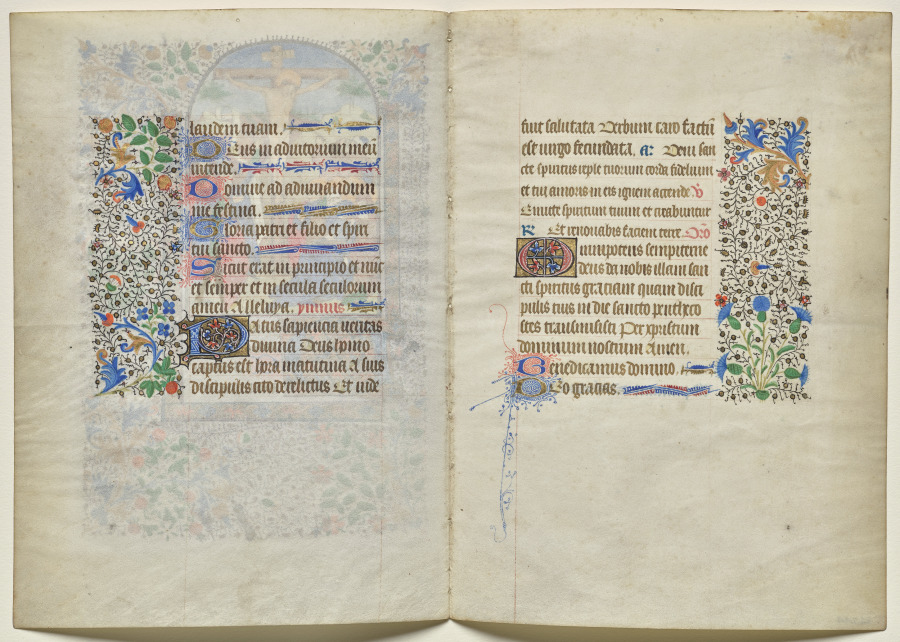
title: Bifolio from a Book of Hours: Text (verso)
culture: France (Angers, Nantes, or Poitiers)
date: c. 1435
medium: ink, tempera, and gold on vellum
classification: Manuscript